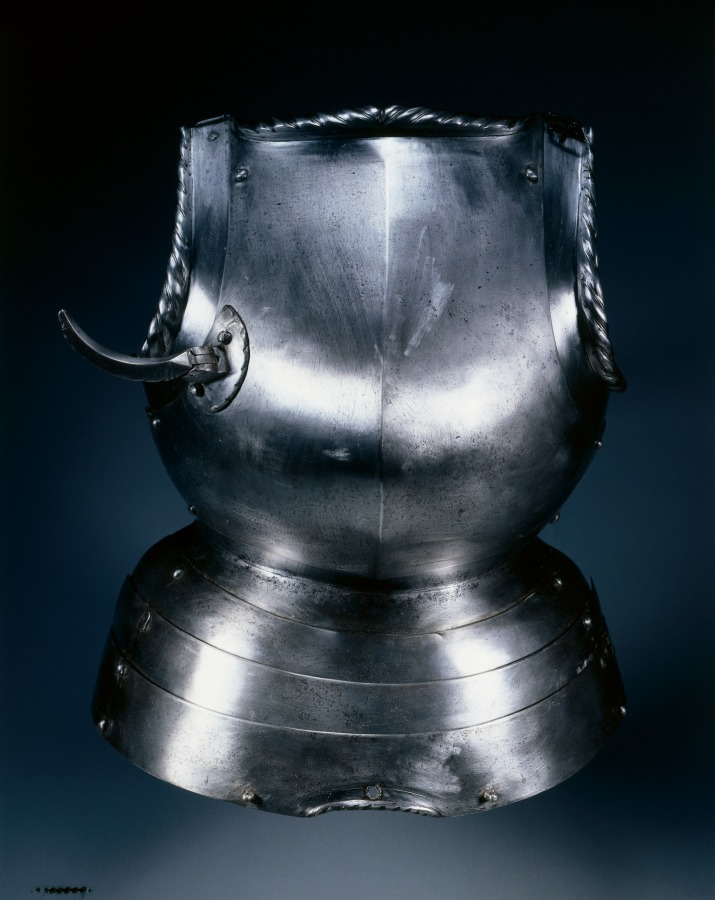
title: Breastplate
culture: Germany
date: c. 1540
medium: steel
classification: Arms and Armor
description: The breastplate protects the chest and abdomen and is normally worn with a backplate. This one features a lance rest which start to appear as early as the late 1300s. The purpose of the lance rest is not to bear the weight of the lance. Instead allows a mounted warrior to hold the lance firmly couched under his right arm and stops it from sliding backward. If the target is hit the lance rest also acts as a shock absorber, preventing the lance from shooting backward and dispersing the impact via the breastplate all over the upper body rather than leaving it concentrated on the hand. When not needed it can be folded up so that is is out of the way.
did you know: The decoration along the edge is known as a roped edge.